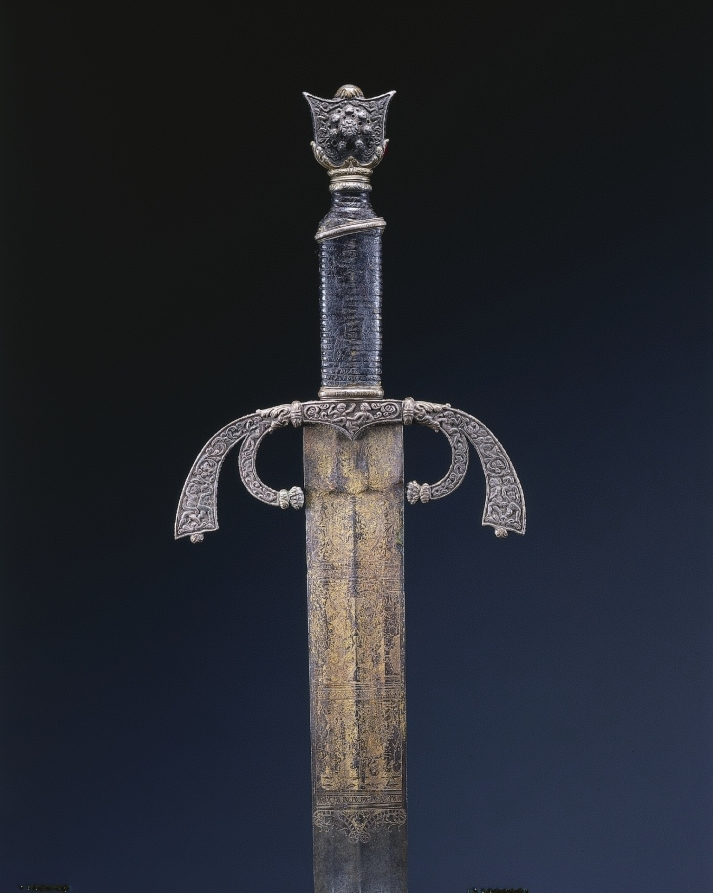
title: Parade Sword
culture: Italy, Ferrara, early 16th Century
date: c. 1500–1525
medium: steel, etched and gilded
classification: Arms and Armor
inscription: Ercole dei Fideli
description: This parade sword has a steel blade with etched and gilded bands of decoration. The decoration includes allegorical figures such as dancing satyrs and nymphs, amorini or cupids, and triumphs. The pommel, the rounded knob on the end of the handle, is flat and shaped like a shield; a raised rosette further embellishes it. The quillons or two transverse projecting members forming the cross guard, are flattened and drooping toward the blade.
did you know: Ercole dei Fedeli was an Italian goldsmith and master sword engraver; his name appears on this blade.